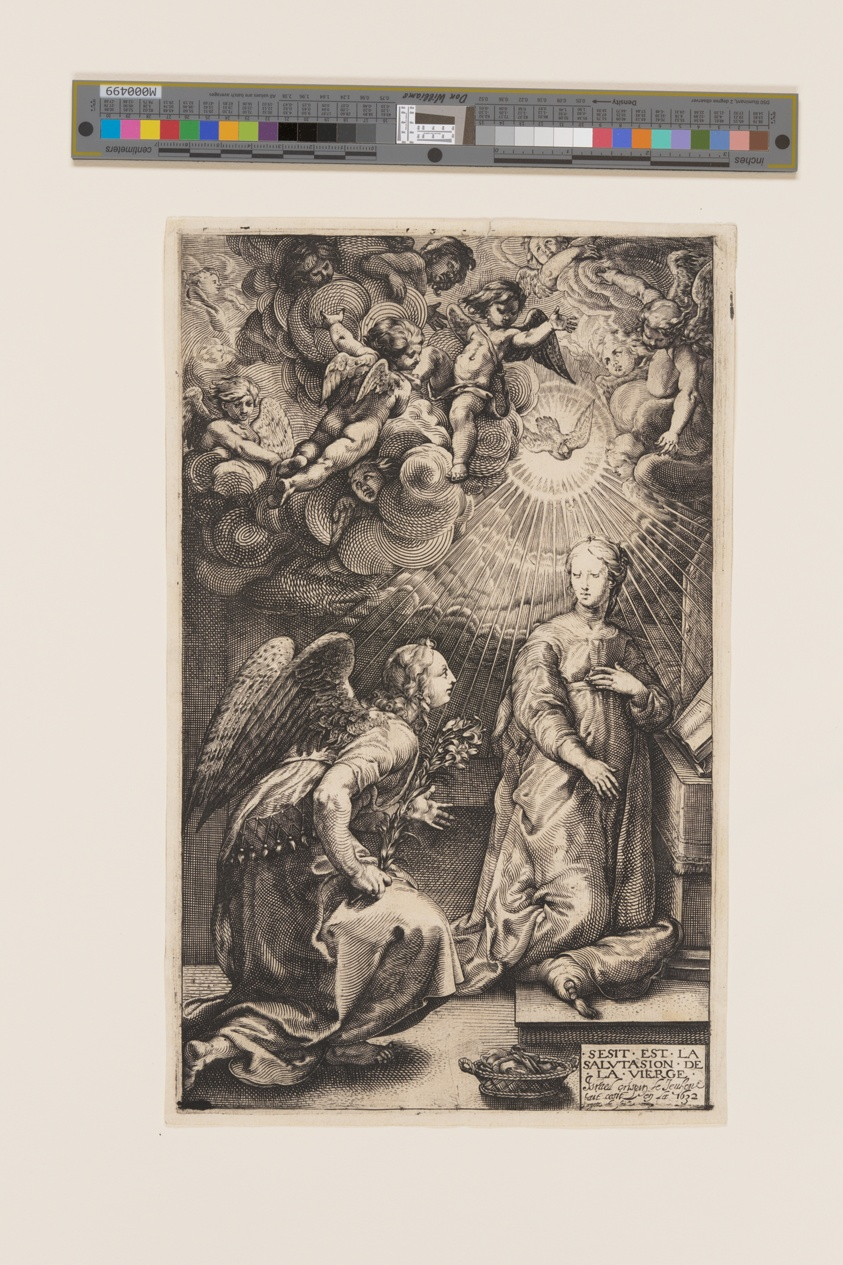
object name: Print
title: Annunciation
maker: Israël Crispin (French, born 1616); after Hendrick Goltzius (Dutch, 1558-1617)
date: 1632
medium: Engraving on ivory laid paper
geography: France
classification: engraving; paper; print; prints and drawing